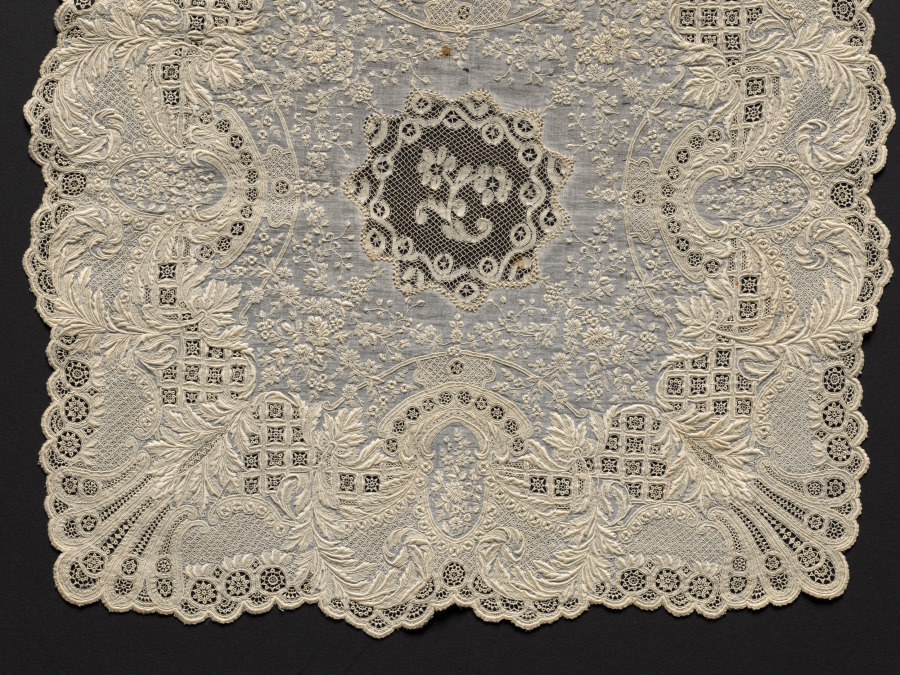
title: Lace Handkerchief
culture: Switzerland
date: 1700s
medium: Plain weave linen with bobbin lace (Valenciennes) center and embroidery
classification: Embroidery